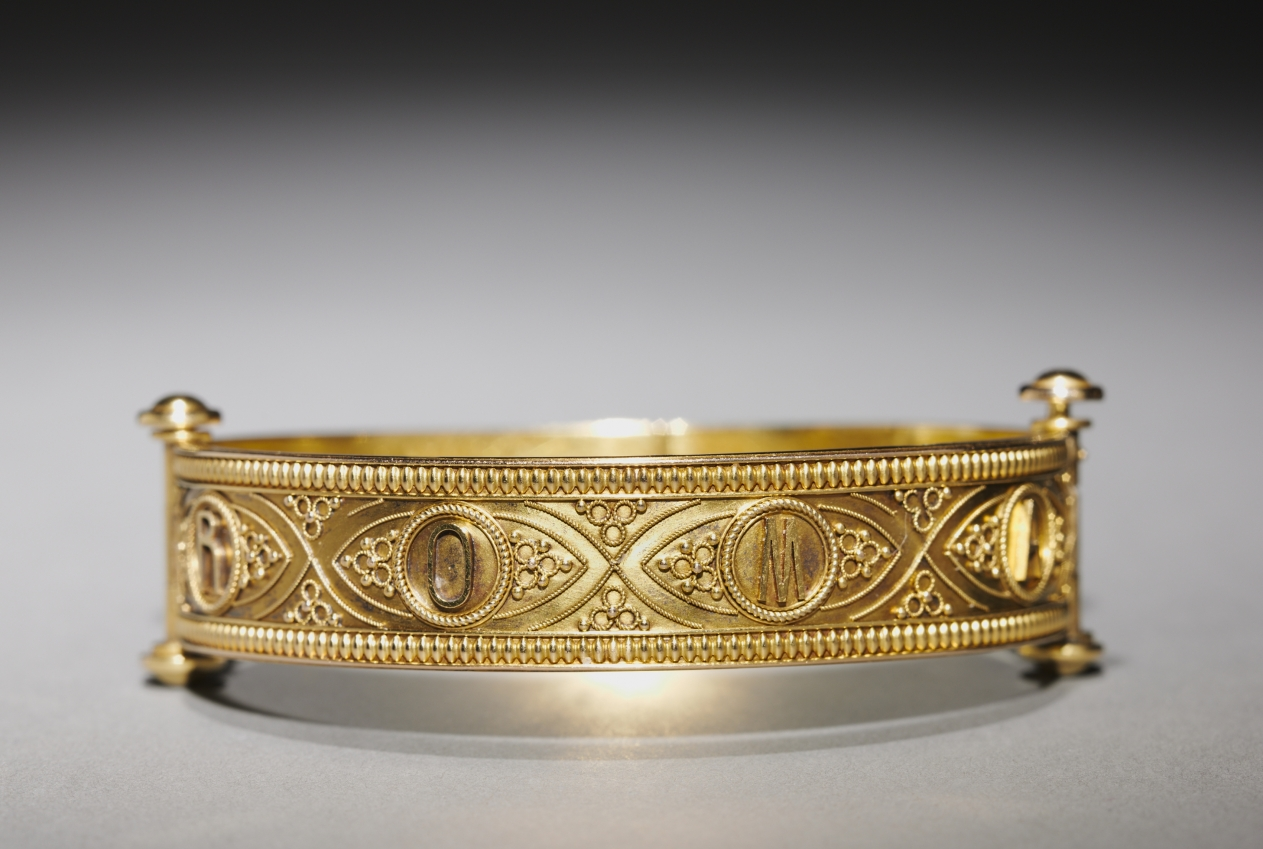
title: Bangle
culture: Italy, Rome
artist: attributed to Fortunato Pio Castellani Firm (Italian)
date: c. 1860–70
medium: gold, glass mosaic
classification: Jewelry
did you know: This bracelet is decorated with tiny tesserae or pieces of glass that create a micro-mosaic.